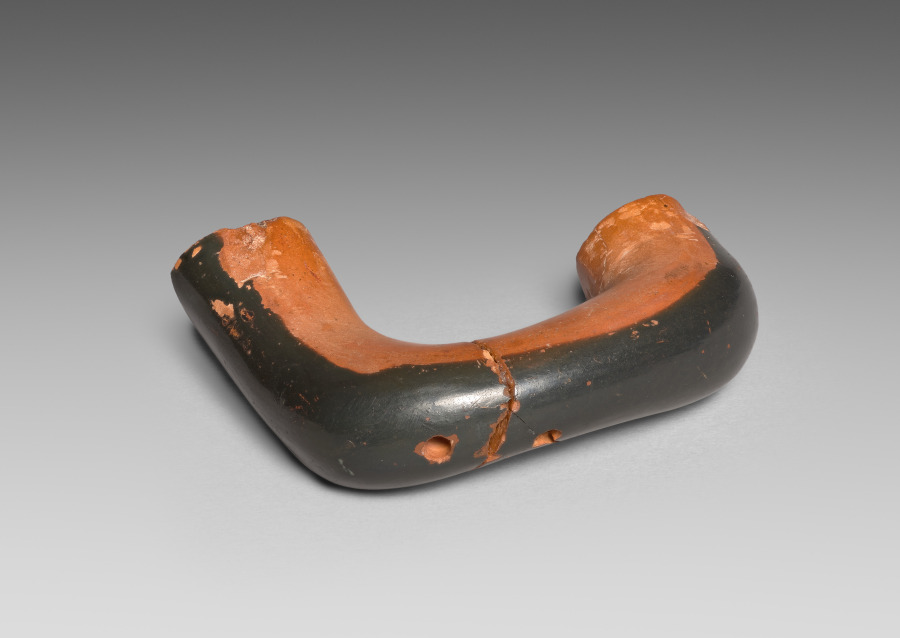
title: Handle from Red-Figure Kylix (Drinking Cup)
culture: Greece, Athens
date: c. 480 BCE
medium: ceramic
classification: Ceramic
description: Although very similar to the ancient handle tip that it was used to replace, the drill holes in this fragment suggest that it was attached in modern times (before 1915). It was removed during an extensive conservation treatment in 1990.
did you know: Originally from a different kylix, this handle tip was used in a modern repair.